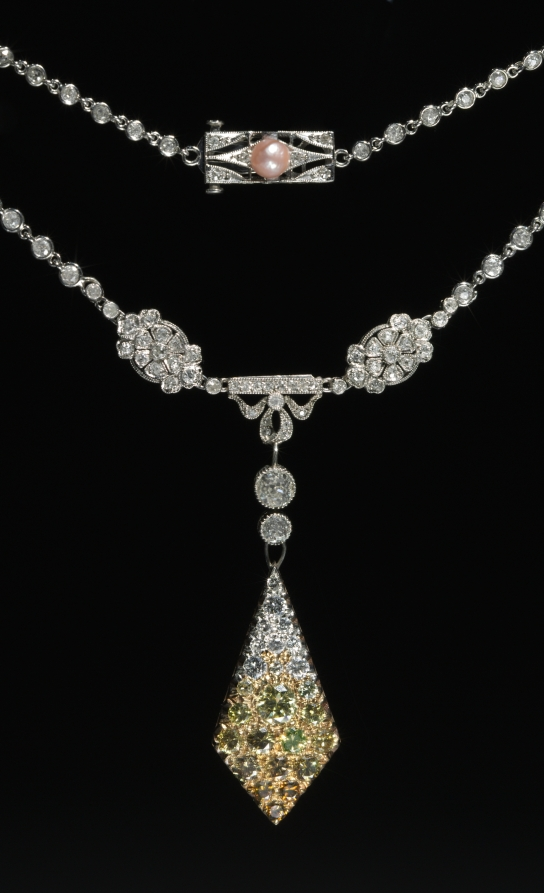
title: Necklace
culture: America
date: c. 1900–20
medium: diamonds, pearl, gold, platinum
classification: Jewelry